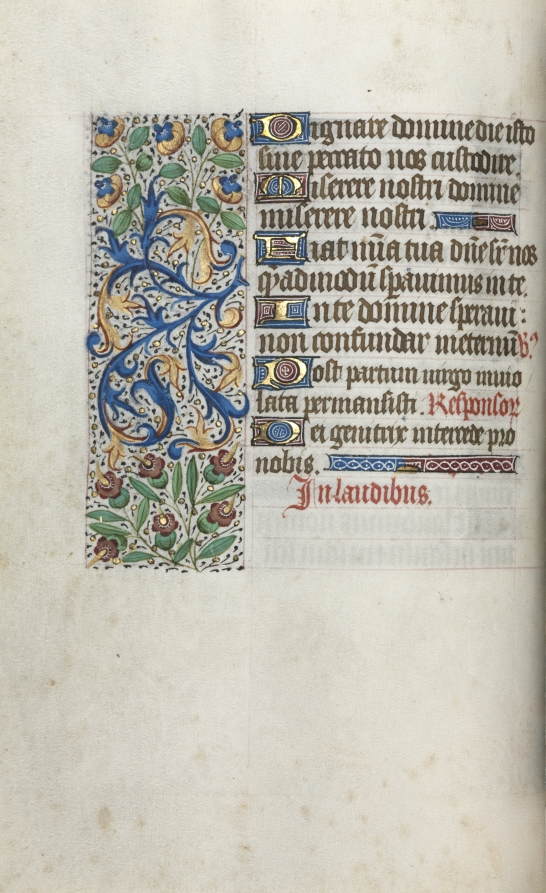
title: Book of Hours (Use of Rouen): fol. 38v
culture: France, Rouen, 15th century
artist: Master of the Geneva Latini (French, active Rouen, 1460–80)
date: c. 1470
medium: ink, tempera, and gold on vellum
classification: Bound Volume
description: In the late 1400s and early 1500s Rouen was an established and important center of book production. The city’s cathedral had a wealthy chapter that spent large sums of money to commission books and to maintain its extensive library. The stationers and booksellers would have likely been concentrated in or near the cathedral precinct. This artist, named after a manuscript now in Geneva, was Rouen’s principal illuminator during the second half of the 1400s.